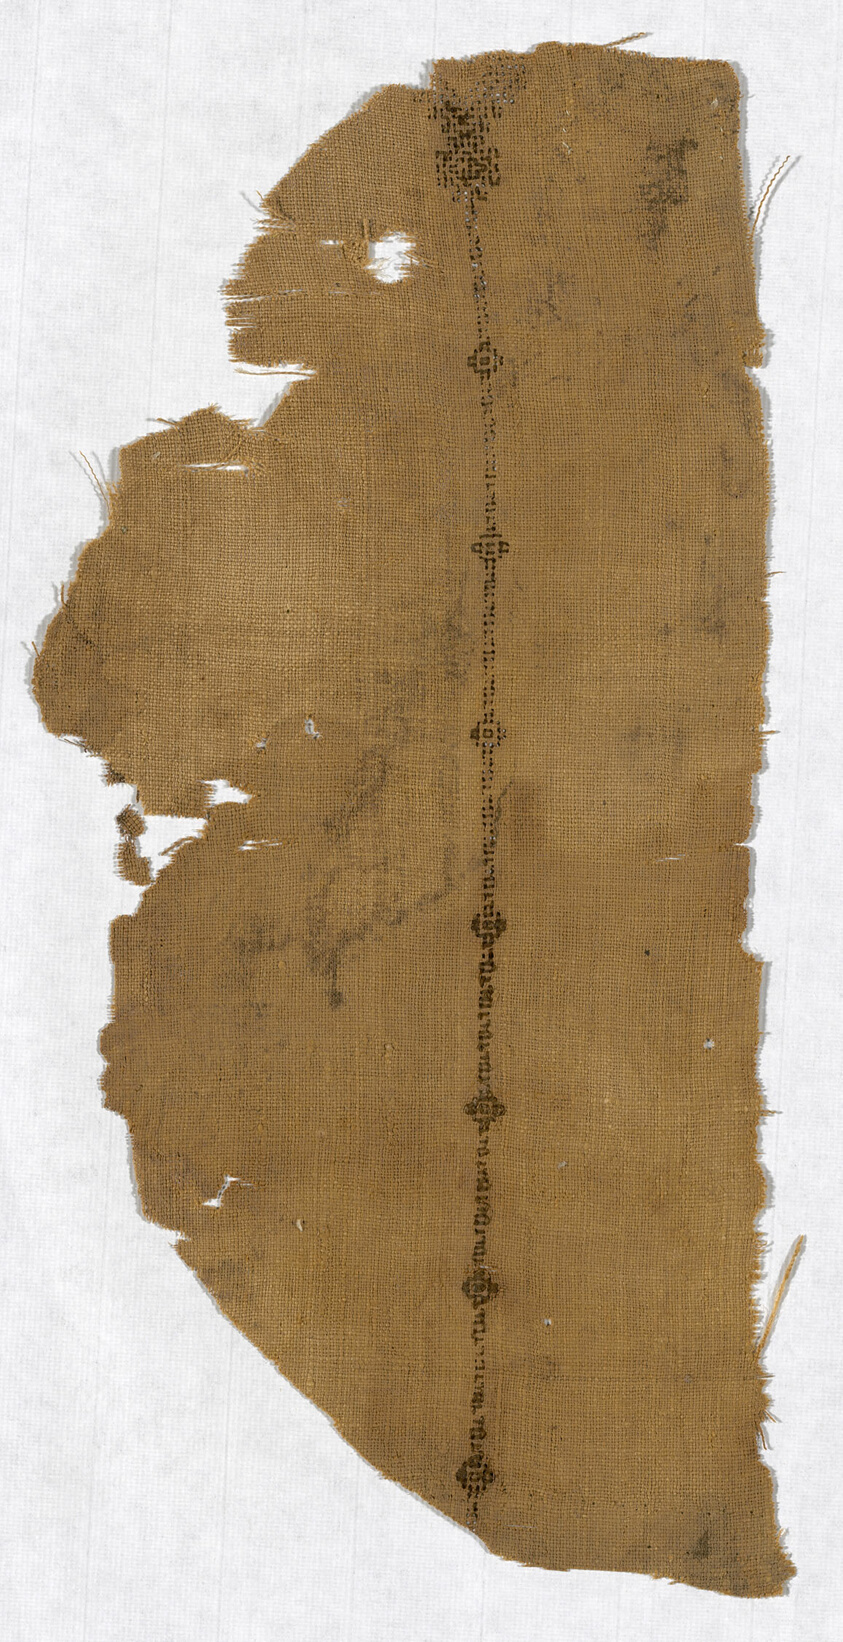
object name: Textile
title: Fragment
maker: Egypt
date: Arab period (641–969)/Fatimid period (969–1171)/Ayyubid period (1171–1250), 9th/12th century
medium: Linen, embroidered in black silk thread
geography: Egypt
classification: textile; needlework (visual works)